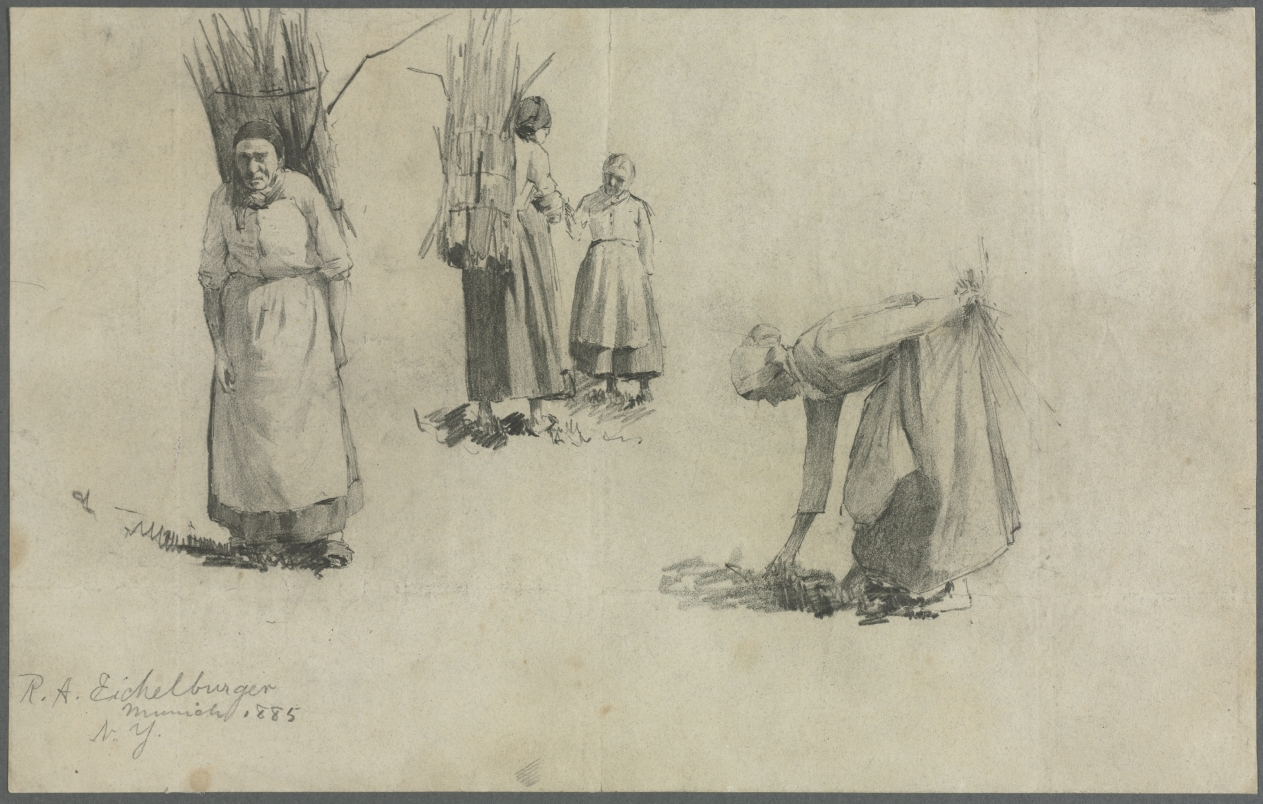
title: Bavarian Peasants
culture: America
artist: Robert A. Eichelberger (American, 1890)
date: 1885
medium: pencil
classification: Drawing